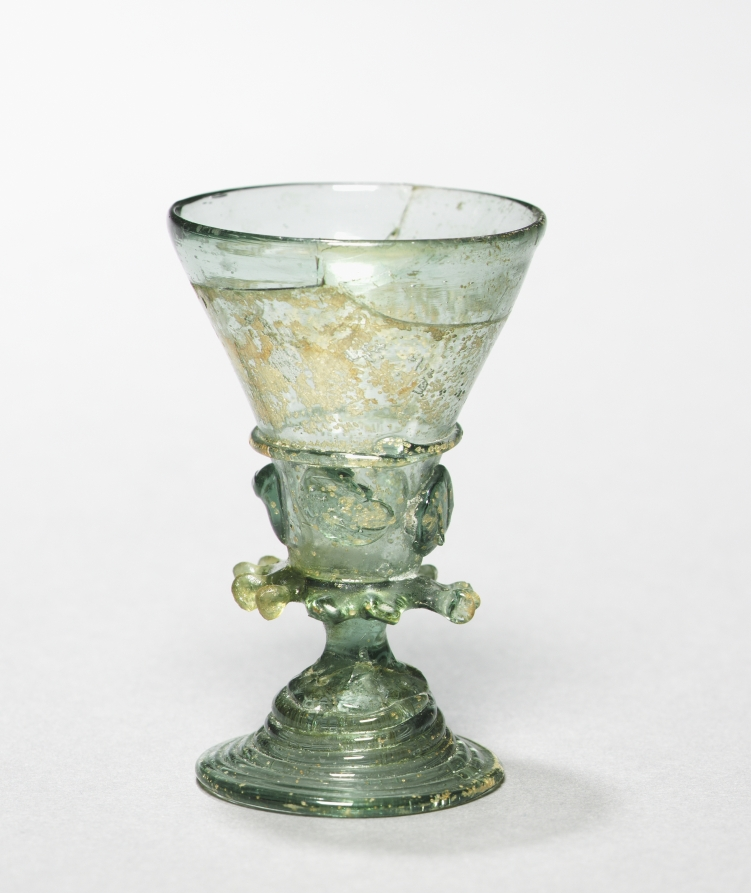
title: Goblet (Berkemeyer)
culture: Germany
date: c. 1525–1550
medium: green glass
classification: Glass